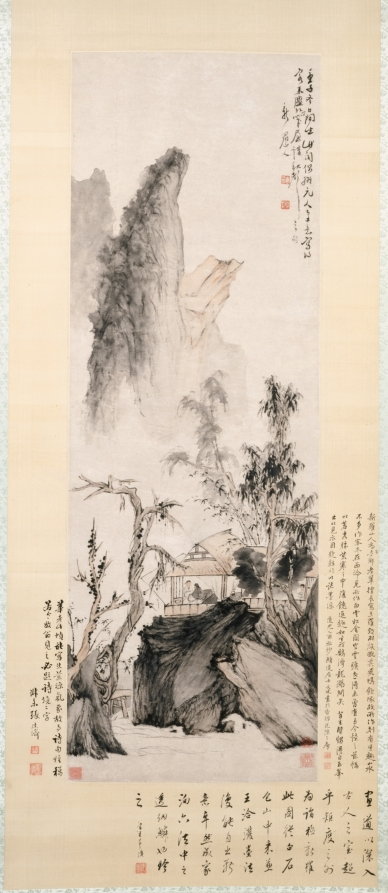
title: Conversation in Autumn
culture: China, Qing dynasty (1644-1911)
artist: Hua Yan (Chinese, 1682–c. 1765)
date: 1732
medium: Hanging scroll; ink and light color on paper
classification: Painting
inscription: Artist's inscription, signature, and 2 seals: On a winter day in the renzi year [1732], while leisurely sitting in my mountain pavilion, I happened to have imitated the brush style of Yuan masters on the two verses: "A guest came from the dusty world for a visit; in the small cottage we talked about the sound of autumn." Xin luo shan ren 新羅山人 [seals] Hua Yan 華喦; Qiuyue 秋岳.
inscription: 1 colophon and 2 seals of Zhang Tingji 張廷濟 (1768–1848): Old Hua [Yan], in this painting, was able to evoke the mood of desolation in nature and match the poetry elegantly. If Fangweng [Lu You 陸游 (1125–1210)] saw this, he would inscribe the painting with two words "idyllic world 詩境."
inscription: 新羅山人為吾鄉老輩，擅長寫生。羅致羽族，翫其飛鳴飲啄。故所作別有生趣。山水不多。作客冬在西泠，見所白雲松舎圖。空靈曠逸，得未曾有，至今憶之。兹幅以蒼秀勝，荒寒之中，復饒逸趣。如坐我鵠灣、龍瀃間矣。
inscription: 1 colophon and 1 seal of Zhu Angzhi 朱昂之 (1764–1841): The highest achievement in the art of painting is to penetrate deeply into the chamber of old masters, but at the same time transcend the bounds of conventional rules. This painting of Xinluo is derived from [the style of] Baishi (Shen Zhou 沈周, 1427–1509) and Baoshan (Lu Zhi 陸治, 1496–1576) with splashed-ink technique of Wang Qia 王洽 (Wang Mo 王默, ?–805), in addition to his own innovative ideas. Hence the distinctive style. Truly, he is one of those who passed through the net of the Six Canons [of Xie He 謝赫, 479–502]; treasure it.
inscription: 2 seals of Ye Tingguan 葉廷琯 (b. 1791); 1 seal unidentified.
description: Two figures sit conversing in a thatched cottage. This painting illustrates two poetic lines: My guest came to sit beyond the dust, In a narrow room, we talked about the autumnal sounds of autumn. Hua Yan presented an intimate world—simple and rustic—amid a landscape. The cool wilderness depicted in this work conveys an aloofness that may reveal the inner world of a scholar-artist who failed the civil service examination but preserved a sense of pride and endurance in his humble surroundings.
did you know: A barren tree on the lower left has a hole in its lower trunk through which is visible a young servant carrying food to the gentlemen in the cottage.